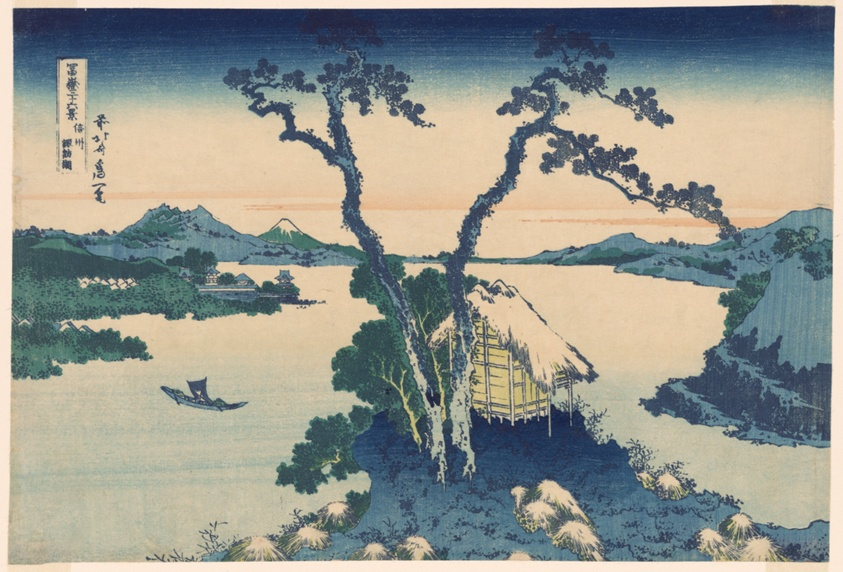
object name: Print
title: Lake Suwa in Shinano Province (Shinshu Suwako), from the series "Thirty-six Views of Mount Fuji (Fugaku sanjurokkei)"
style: Japanese (culture or style)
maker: Katsushika Hokusai 葛飾 北斎; Japanese, 1760-1849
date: c. 1830/33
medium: Color woodblock print; oban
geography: Japan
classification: woodblock print; print; asian art